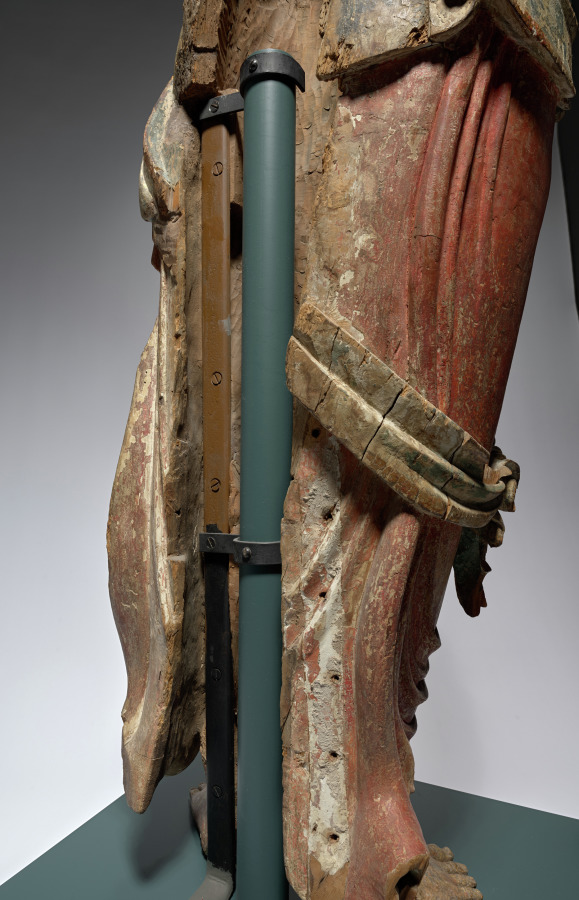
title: Eleven-Headed Guanyin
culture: China, late Northern Song dynasty (960-1127) - Jin dynasty (1115-1234)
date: 1100–1200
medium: wood with polychromy and cut gold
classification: Sculpture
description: The bodhisattva is an enlightened being dedicated to the spiritual awakening of all beings. The compassionate bodhisattva Guanyin, in a variety of manifestations, is probably the most popular deity of worship in Chinese Buddhism. In the Esoteric Buddhist form shown here, this standing Guanyin has a total of eleven heads, with smaller ones above the principal head. The uppermost head represents the Buddha Amitabha, to whom he is closely related. The eleven heads symbolize the Buddha’s steps on the path to enlightenment.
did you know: This Guanyin is carved from a single block of willow (genus Salix sp.).